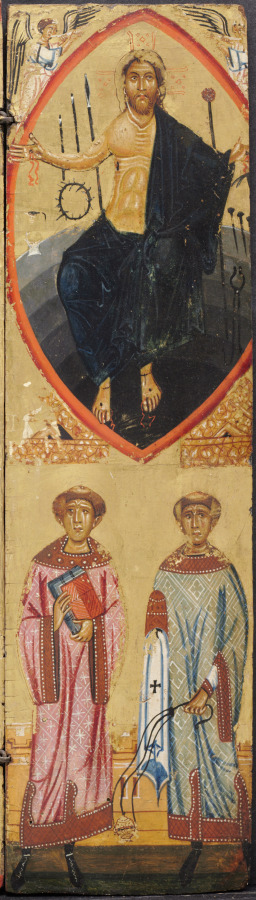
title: Christ in a Mandorla, with the instruments of the Passion, with St. Stephen and St. Lawrence below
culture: Italy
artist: Berlinghiero (Italian, before 1242)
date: c. 1230s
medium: tempera and gold on wood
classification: Painting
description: This small altarpiece, intended for a domestic interior or private chapel, consists of three panels, allowing it to be folded and easily transported. Surrounding the Virgin and Child in the center are various saints. On the left is Saint Andrew crucified, with St. Francis and St. Paul below; on the right, Christ with the instruments of the Passion, and St. Stephen and St. Lawrence below. The long expressive lines that define the clothing and hands of the figures are typical of Byzantine painting, which spread from Constantinople to Italy in the Middle Ages. Berlinghiero is one of the earliest Italian painters known by name. He lived in Lucca, the most important artistic center in Tuscany before the rise of Siena and Florence. Berlinghiero headed a large, influential workshop that included his sons.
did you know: This tabernacle was recognized as being by Berlinghiero while in the the collection of Adolphe Stoclet, a wealthy Belgian engineer and collector.